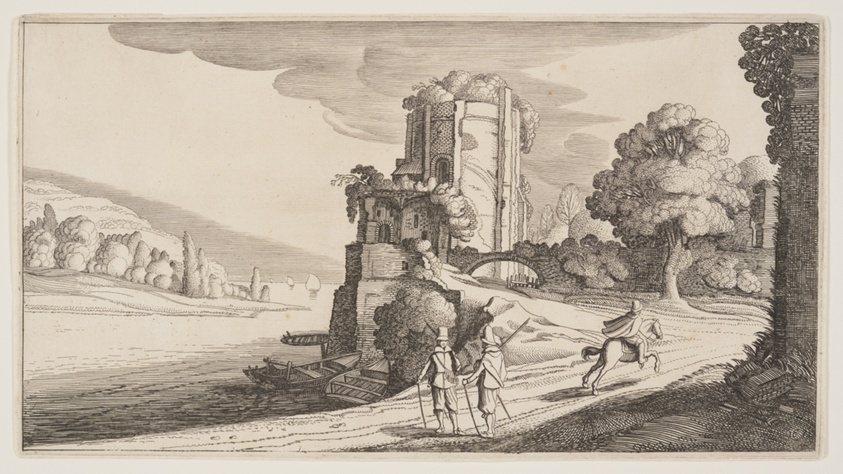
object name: Print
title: Round Tower on a River, from Landscapes (Playsante Lantschappen)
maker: Attributed to Claes Jansz. Visscher II (Dutch, 1586-1652); after Jan van de Velde II (Dutch, c. 1593-1641)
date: c. 1641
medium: Etching, with engraving, on ivory laid paper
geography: Netherlands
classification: etching; paper; print; prints and drawing